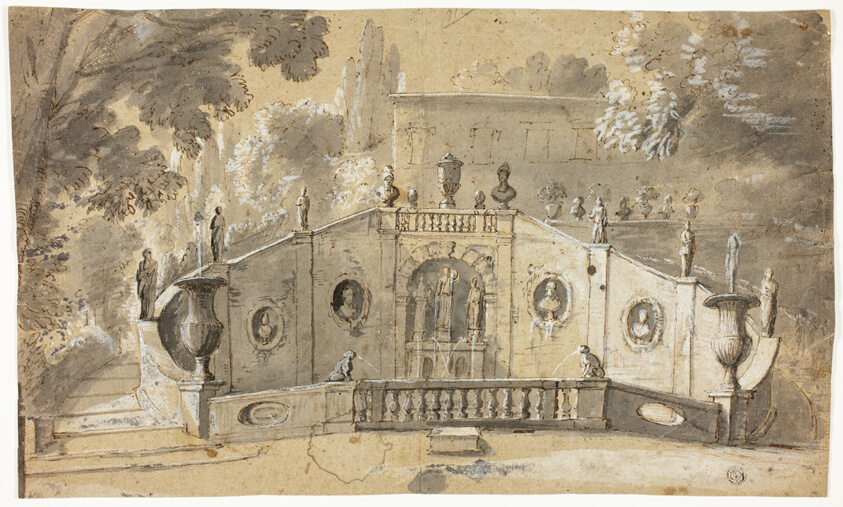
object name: Drawing and Watercolor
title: Staircase and Fountain (recto); Seated Male Nude in Profile to Left, Looking Upward (verso)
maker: Unknown Artist; Italian, 1600-1699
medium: Pen and brown ink, with brush and gray wash, heightened with white gouache (recto), and black chalk, heightened with white chalk (verso), on tan laid paper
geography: Italy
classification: drawings (visual works); prints and drawing; chalk; paper; pen and ink drawings